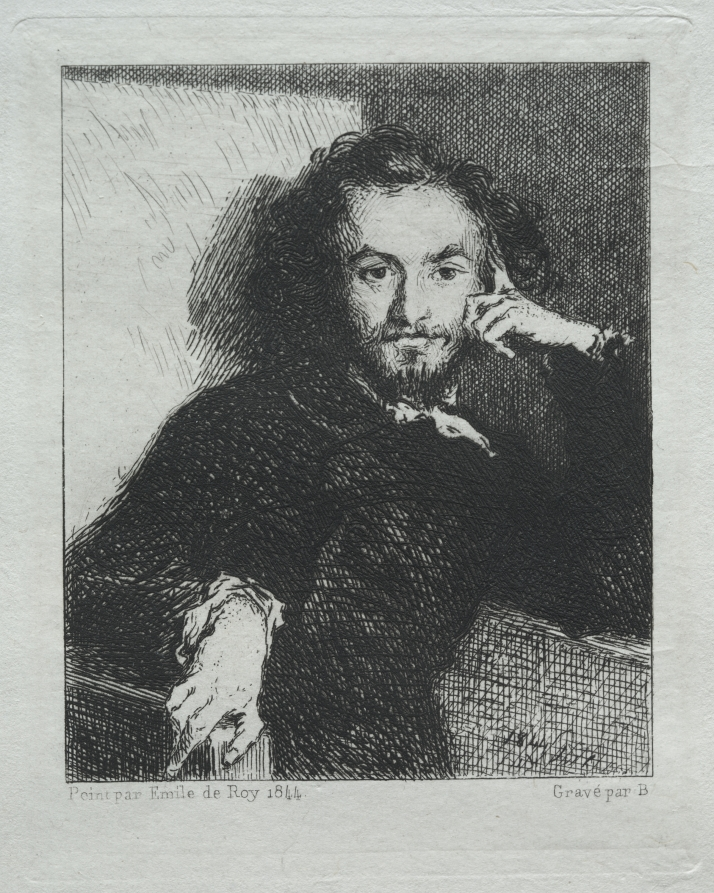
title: Baudelaire, after Emil de Roy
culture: France, 19th century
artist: Félix Bracquemond (French, 1833–1914)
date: 1869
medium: etching and drypoint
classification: Print